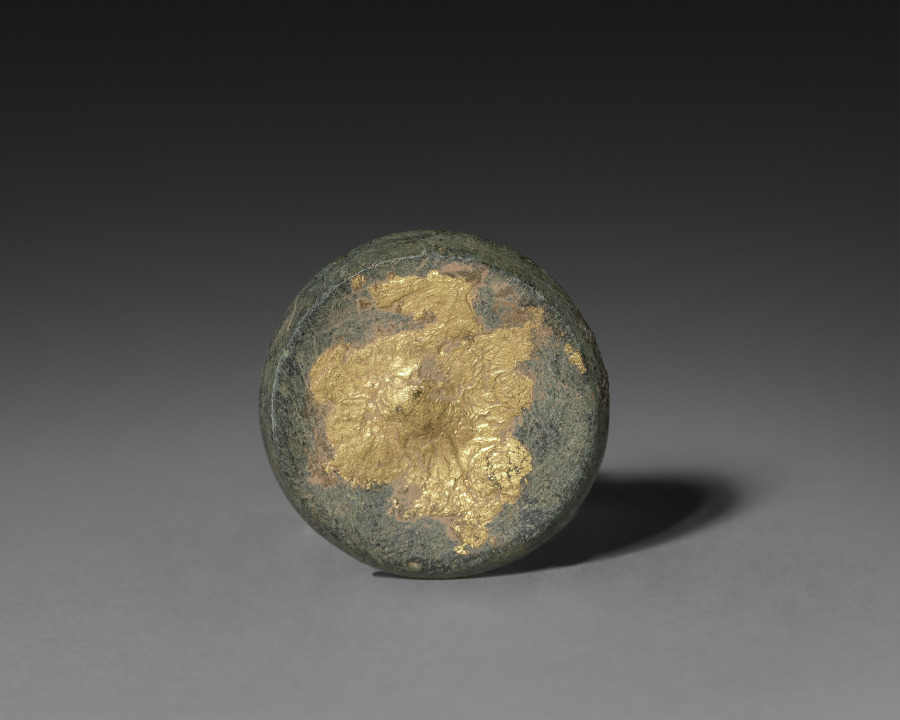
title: Miniature Stone Reliquary or Toilette Casket (lid)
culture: Pakistan, Gandhara, probably Sirkap, early Kushan period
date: 1–100 CE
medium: gray schist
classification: Sculpture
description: Tiny reliquaries holding the cremated remains of the Buddha or a high-ranking holy person empowered monuments and made them sacred. A Buddhist monument, such as the solid hemispherical mounds called stupas, would not be worshipped until it was consecrated with the relic secreted inside. Bits of ash were combined with tiny gems inside a crystal or glass reliquary, which was then placed inside a stone or metal container, like the lidded versions seen here. These containers look like cosmetic vessels for aromatic pastes used for perfume in ancient India. Buddhist texts state that the enlightened Buddha emitted a fragrance like sandalwood paste; the form of the reliquary as a perfume bottle indicates the presence of the Buddha by the visual reference to his pleasant scent. Once enclosed in the stupa the reliquaries would not be seen, but monks were tasked with applying sandalwood paste to the exterior of stupas as part of their regular maintenance to convey to visitors the ongoing presence of the Buddha radiating from the relic in the center.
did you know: The knob of the lid is gilded, as is the interior of the casket.